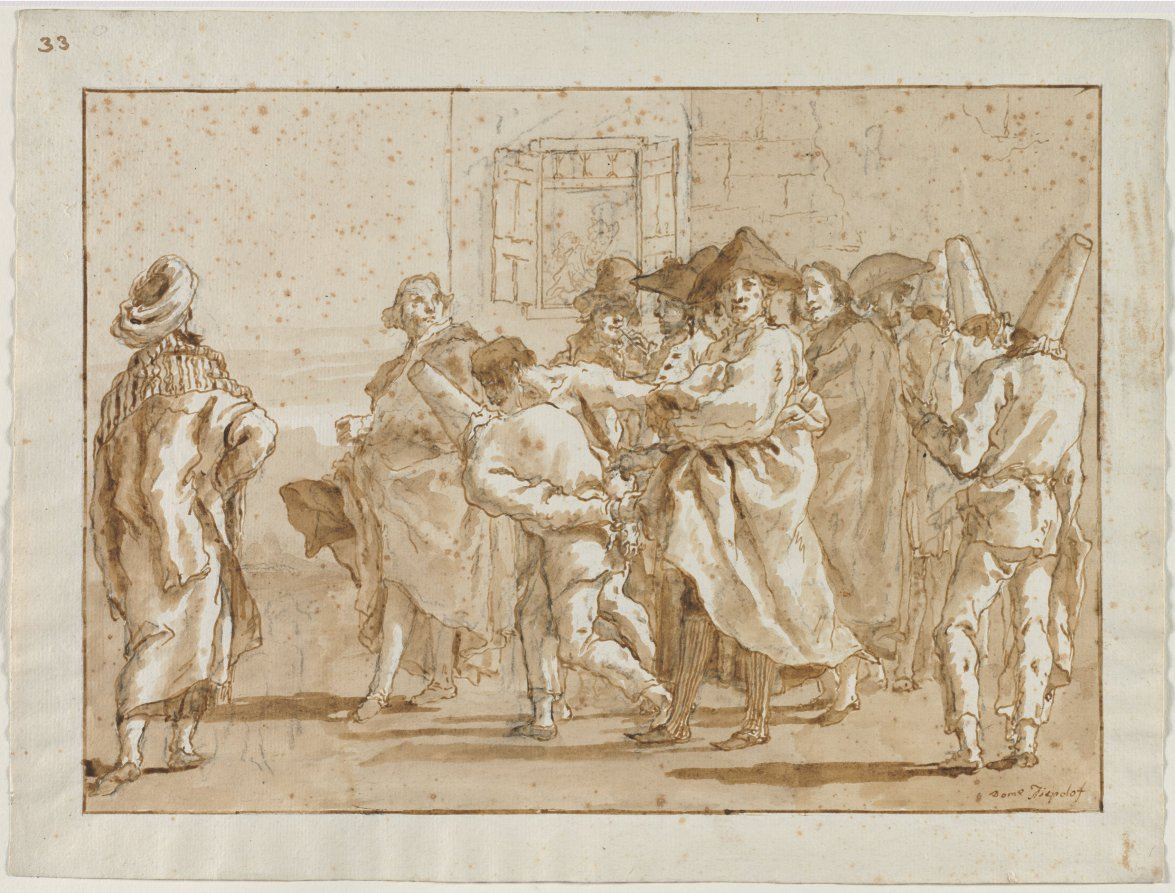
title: Punchinello Arrested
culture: Italy, 18th century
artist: Giovanni Domenico Tiepolo (Italian, 1727–1804)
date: 1790s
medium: pen and brown ink and brush and brown wash, with black chalk; framing lines in brown ink over graphite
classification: Drawing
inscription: signed, lower right, in brown ink: Dom° Tiepolo f ; upper left, in brown ink: 33 ; upper left, in graphite: - o ; VERSO, upper right, in blue crayon: 2